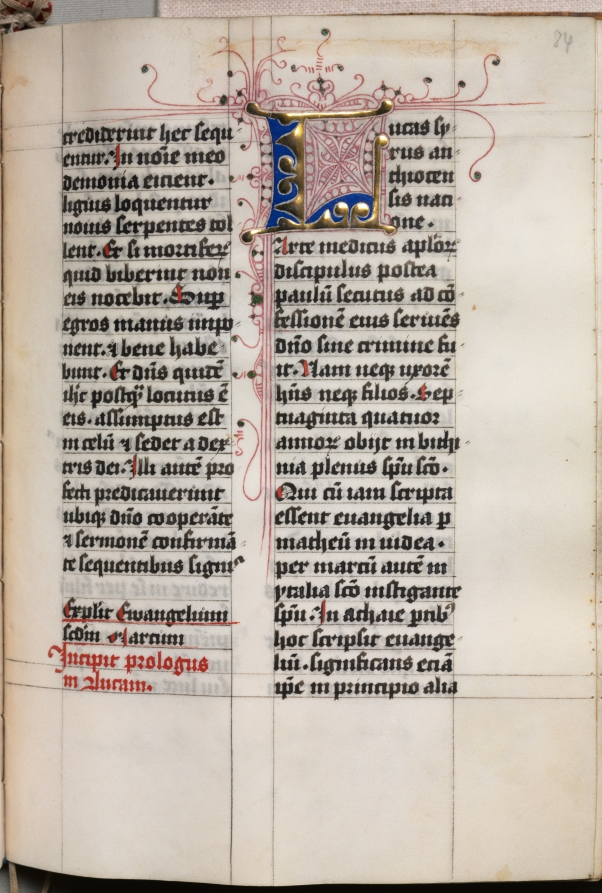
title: Gospel Book with Evangelist Portraits: Decorated Initial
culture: Germany, Middle Rhine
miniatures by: Master of the House-Book (German, c. 1470–1500)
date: c. 1480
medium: ink, tempera, and gold on vellum; original blind stamped leather binding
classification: Bound Volume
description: The four gospels are preceded by a full-page portrait miniature of the appropriate evangelist. Per tradition, they are represented as contemporary scribes surrounded by all the tools of their trade— ink pots, quill pens, and penknives. The anonymous illuminator of these miniatures, called the Hausbuch Master, is known primarily for an album of lively drawings as well as some 90 copper engravings now in Amsterdam. He was also apparently a panel painter of some distinction. The skillful pen work, tracery, and vine scrolls, as well as the large initials, are the work of other artists.The binding is original.